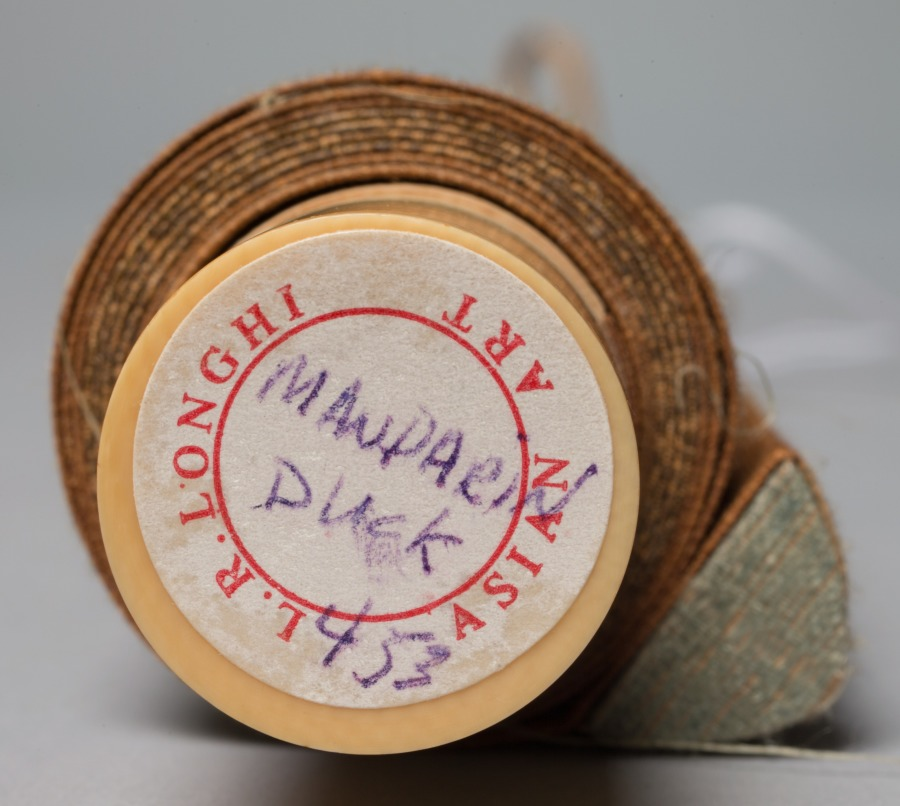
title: Duck in Flight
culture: Japan, Muromachi period (1392–1573)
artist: Shikibu Terutada (Japanese, active mid-1500s)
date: mid-1500s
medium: fan painting mounted as hanging scroll; ink and gold on paper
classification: Painting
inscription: artist's seal in lower right.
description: These three fan-shaped paintings, now mounted as individual hanging scrolls, were once part of a set of 20 mounted on a folding screen. They portray the Chinese subjects, from left to right, of the scholar-official Pan Lang, Hanshan reciting his poetry to Shide, and a duck in flight above reeds. Pan Lang grew so fond of the mountain in his place of exile that when he was ordered back to the capital, he rode backward on his donkey so he could see it until it receded into the distance. Hanshan and Shide worked in the kitchen of a Zen monastery, but were actually reincarnations of the bodhisattvas Manjushri and Samantabhadra. The combination of a mandarin duck and reeds may have signified a level of attainment in Chinese civil service exams. All three paintings bear the seal of the Kantobased artist Shikibu Terutada. Shikibu was familiar with Kano school painting, but he also modeled his early style after that of the prominent Kanto-based Kenkō Shōkei (active about 1470–after 1523).